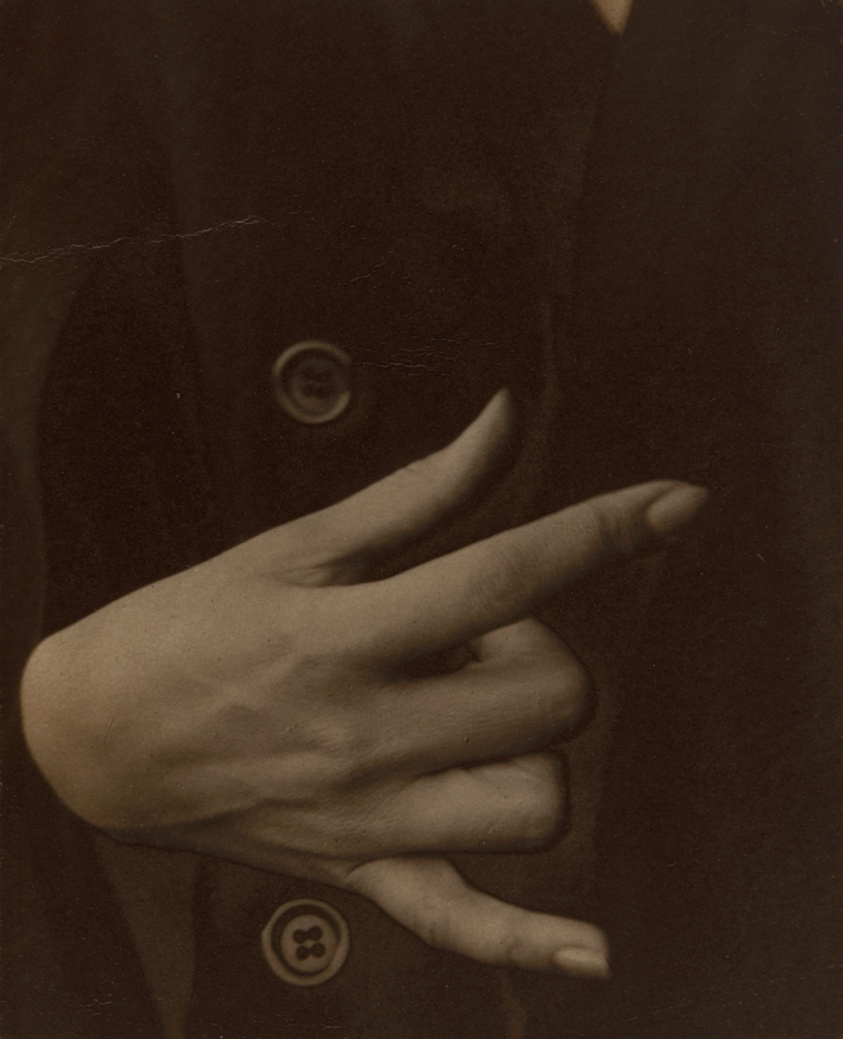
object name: Photograph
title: Georgia O'Keeffe—Hand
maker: Alfred Stieglitz (American, 1864–1946)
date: 1918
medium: Palladium print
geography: United States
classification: palladium print; photographic process; photography; photograph